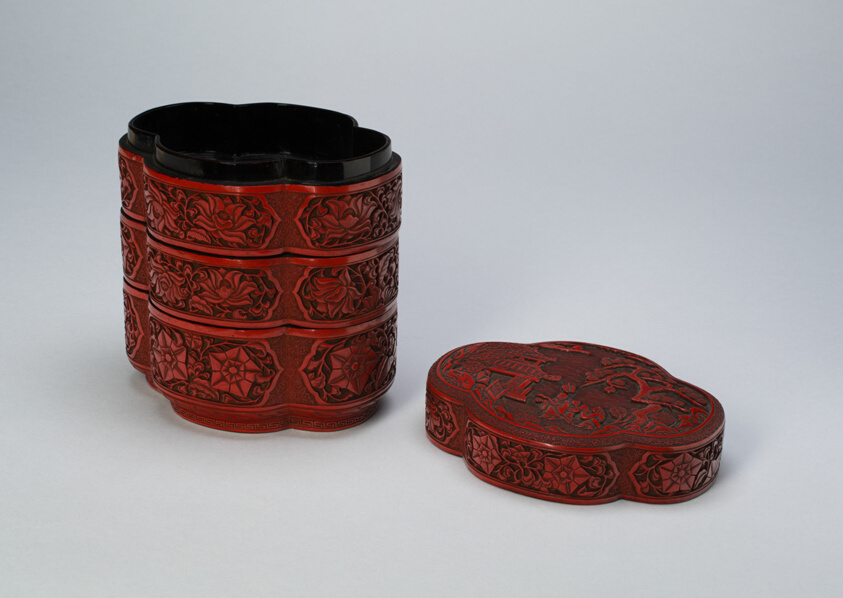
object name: Vessel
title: Carved Lacquer Boxes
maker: China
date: Ming dynasty (1368–1644), early 15th–late 16th century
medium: Carved cinnbar lacquer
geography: China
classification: lacquerware; asian art; decorative arts